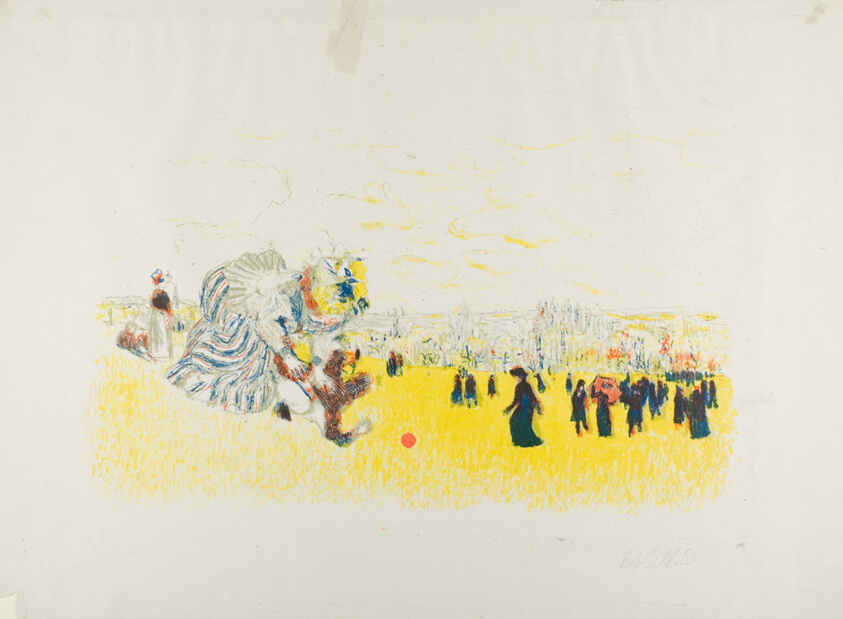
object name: Print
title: Children's Games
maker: Edouard Jean Vuillard (French, 1868-1940); published by Ambroise Vollard (French, 1835-1939)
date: 1897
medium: Color lithograph on grayish-ivory laid China paper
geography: France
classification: lithograph; print; prints and drawing